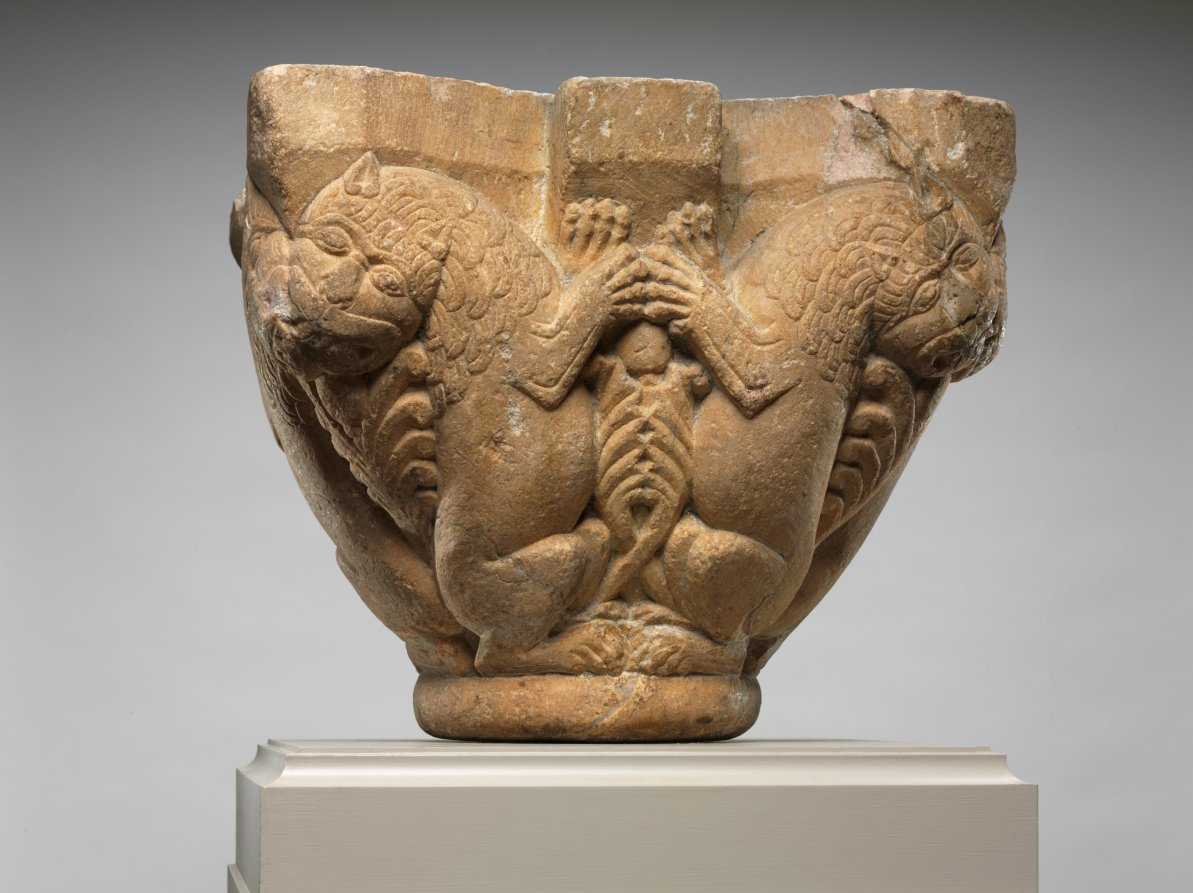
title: Engaged Capital with Lions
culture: Northern Spain (Navarre ?) or Southwest France (Pyrénées or Roussillon ?), mid-12th century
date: 1145–64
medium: marble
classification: Sculpture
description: The compositional motif of confronted and addorsed beasts illustrated on this capital was especially popular in churches along the pilgrimage roads.